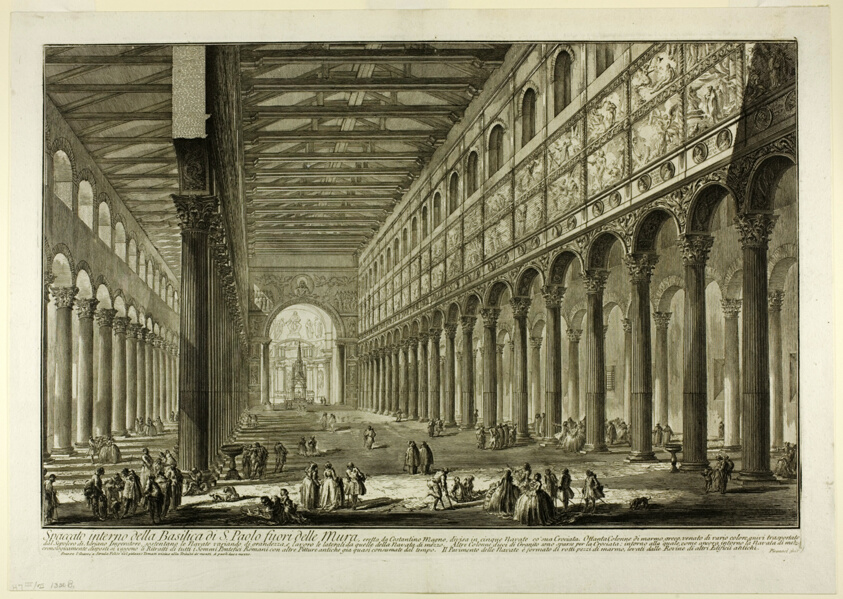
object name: Print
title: Cut-away view of the interior of the Basilica of S. Paolo fuori delle Mura [St. Paul outside the Walls], from Views of Rome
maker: Giovanni Battista Piranesi (Italian, 1720-1778)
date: 1749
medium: Etching on heavy ivory laid paper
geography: Italy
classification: etching; print; prints and drawing